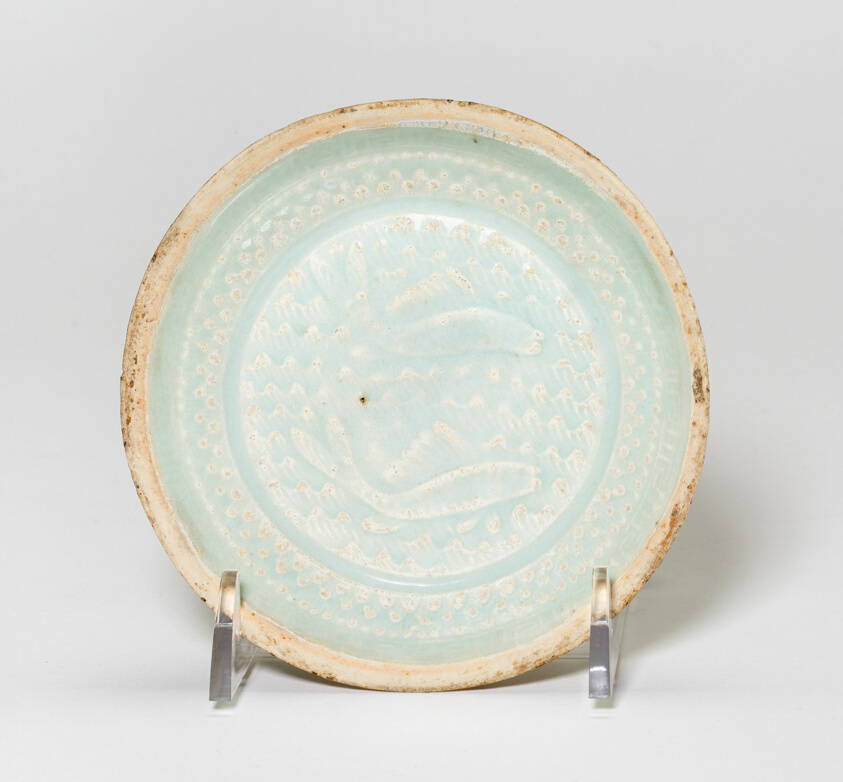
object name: Vessel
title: Saucer-Shaped Dish with Fish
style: Chinese (culture or style)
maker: China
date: Song dynasty (960–1279)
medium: Qingbai ware; stoneware with underglaze molded decoration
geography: China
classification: dish (vessel); asian art; ceramics; vessel